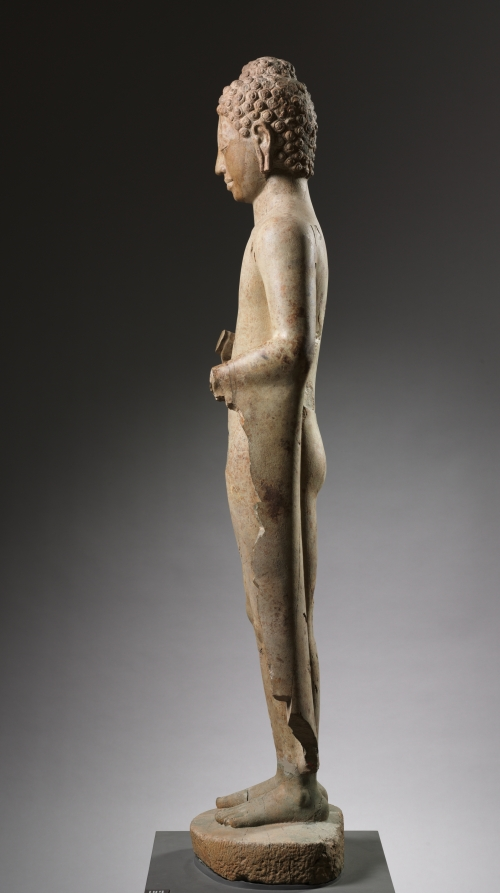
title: Buddha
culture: Thailand, probably Shri Thep, Mon-Dvaravati style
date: 600s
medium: sandstone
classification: Sculpture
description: This elegant, monumental sculpture is the earliest type of Buddha image to be made in Southeast Asia. It comes from a site in north-central Thailand that was part of the Dvaravati kingdom (500s–1200s). The body shows direct links with the sculptural traditions at Sarnath in northern India on the banks of the Ganges River. The expression of the face has the peaceful introspection that became canonical during the Gupta period of the 5th century in India. The shape of the head and facial features—unlike Indian precursors—suggest that the artists and patrons of Dvaravati made the Buddha resemble the local Mon population. The figure's stance has been rendered with remarkable fluidity, and the abstracted caps of the knees and minimalist modeling of the pelvis lend the figure an otherworldly, transcendent demeanor, balanced by the approachable smiling countenance.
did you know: Now reunited for display, CMA acquired the sculpture in two pieces, when the feet (CMA 1974.91) and the body were found in separate locations.